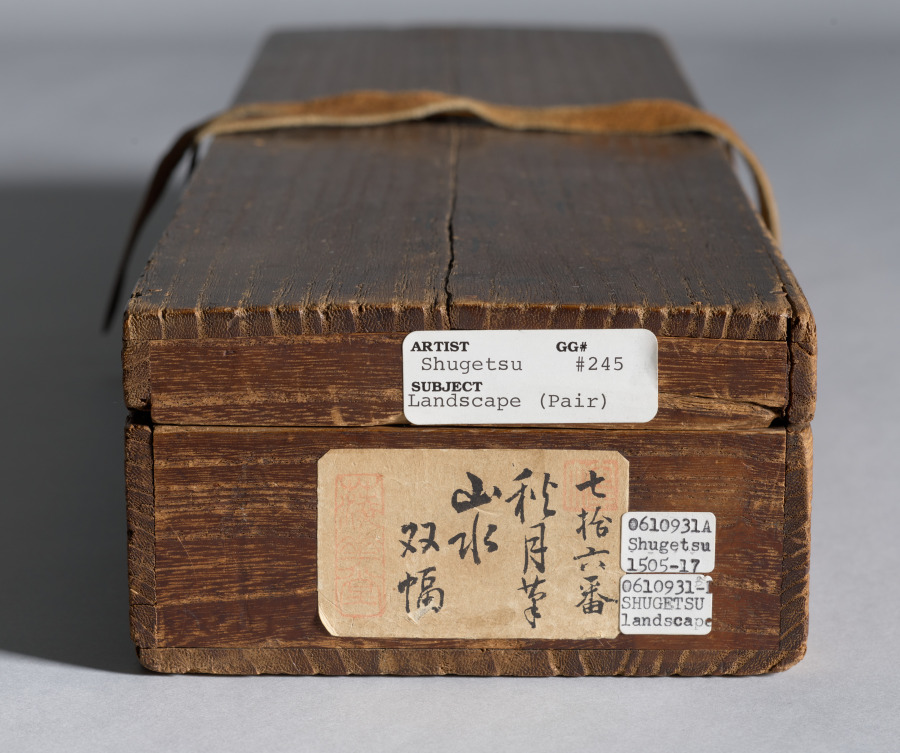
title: Landscapes with Figures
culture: Japan, Muromachi period (1392–1573)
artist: Shūgetsu Tōkan (Japanese, 1440?-1529)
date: c. 1500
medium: pair of hanging scrolls; ink on paper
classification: Painting